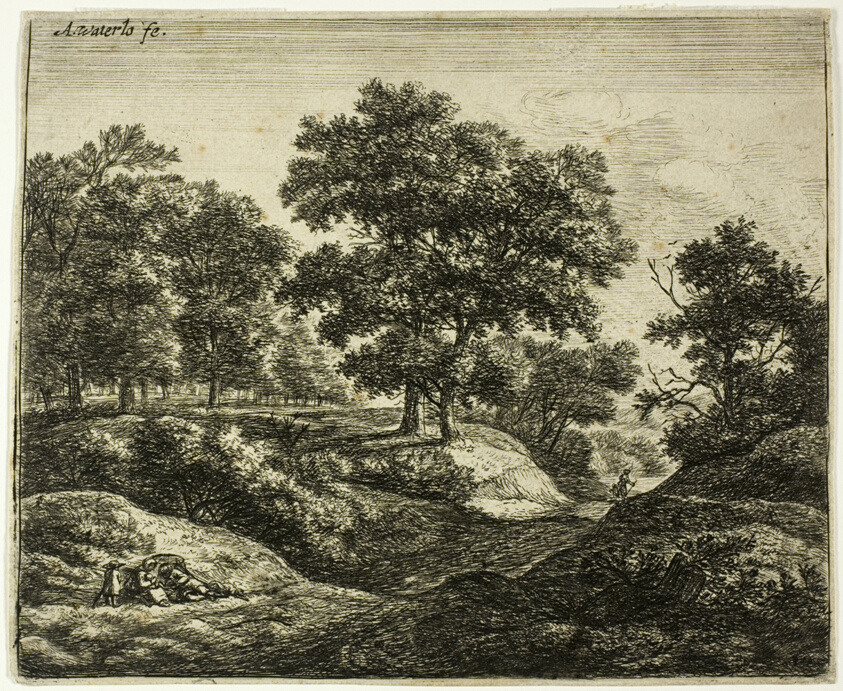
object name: Print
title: Family Resting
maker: Anthonie Waterloo (Dutch, c. 1610-1690)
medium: Etching on paper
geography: Holland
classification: etching; print; prints and drawing